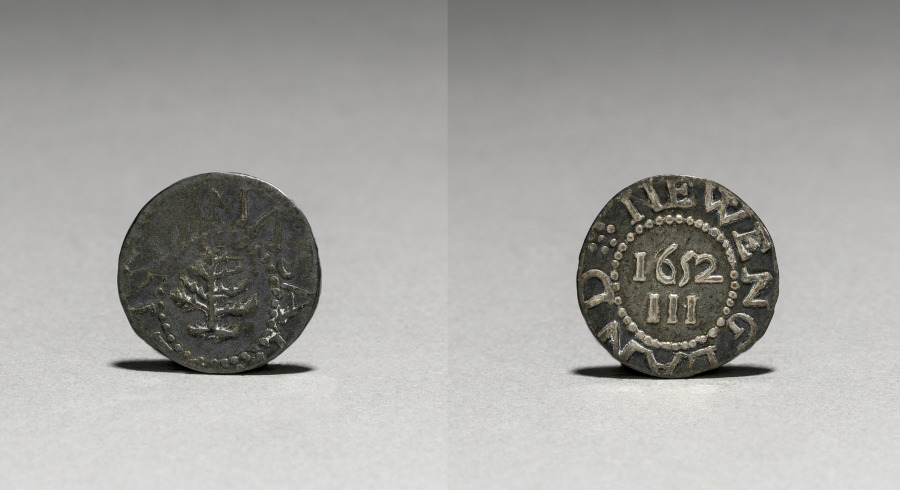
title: Pine Tree Three Pence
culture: America, Massachusetts, Boston, 17th century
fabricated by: John Hull (American, 1624–1683)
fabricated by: Robert Sanderson (American, 1609–1693)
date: 1652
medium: silver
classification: Coins